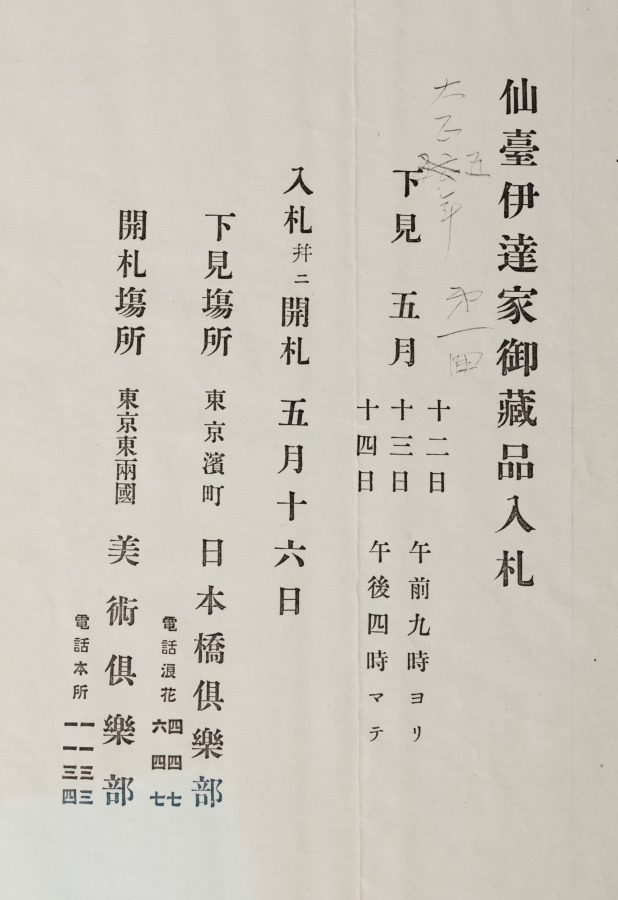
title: Gibbons Reaching for the Moon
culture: Japan, Edo period (1615–1868)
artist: Kano Tan’yū (Japanese, 1602–1674)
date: 1600s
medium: Hanging scroll; ink and light color on silk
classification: Painting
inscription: signed: "Tan'yūsai hitsu"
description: Long-armed gibbons form a chain to reach down from a tree, hoping to touch what they believe is the moon. In fact, the orb remaining beyond their grasp is the full moon’s reflection in the still surface of a pond or lake. The image is a common metaphor for the deluded mind in Buddhist thought. Gibbons do not live in Japan but were known to Japanese painters of the premodern era through paintings brought from China.